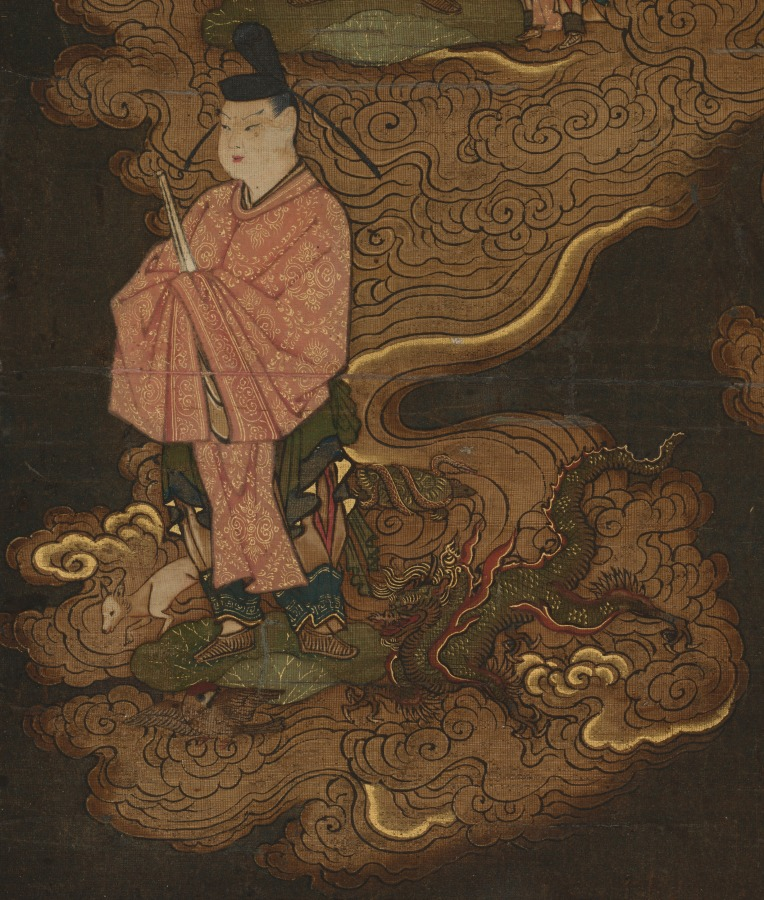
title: Descent of the Nine Luminaries and the Seven Stars at Kasuga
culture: Japan, Nanbokuchō period (1336–92)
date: mid- to late 1300s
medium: Hanging scroll; ink, color, gold and cut gold on silk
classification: Painting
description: This medieval religious painting shows celestial beings descending from the heavens into the Kasuga Shrine, a major religious site in Japan's ancient capital, Nara. The moon and the Kasuga mountain range appear in the uppermost portion of the painting, as does a red shrine entrance gate, or torii. In the upper part of the painting, figural representations of the stars in the constellation known as the Big Dipper in the West descend from right to left on cloud banks. In the lower part, the Nine Luminaries (Sanskrit: Navagraha) that emerged from the Vedic tradition—the sun and moon; the planets Jupiter, Mars, Saturn, Venus, and Mercury; and personifications of the fluctuating lunar nodes—descend in similar fashion. The painting uses the "deities in descent" scheme originating in China, as well as the original Buddhist form mandala (Japanese: honjibutsu mandarazu) format prevalent in medieval Japanese Shinto-Buddhist painting, to generate an image connected to the worship of celestial bodies in Esoteric Buddhism.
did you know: A 19th-century copy of this painting in ink and light color exists at the Kyoto City University of Arts.